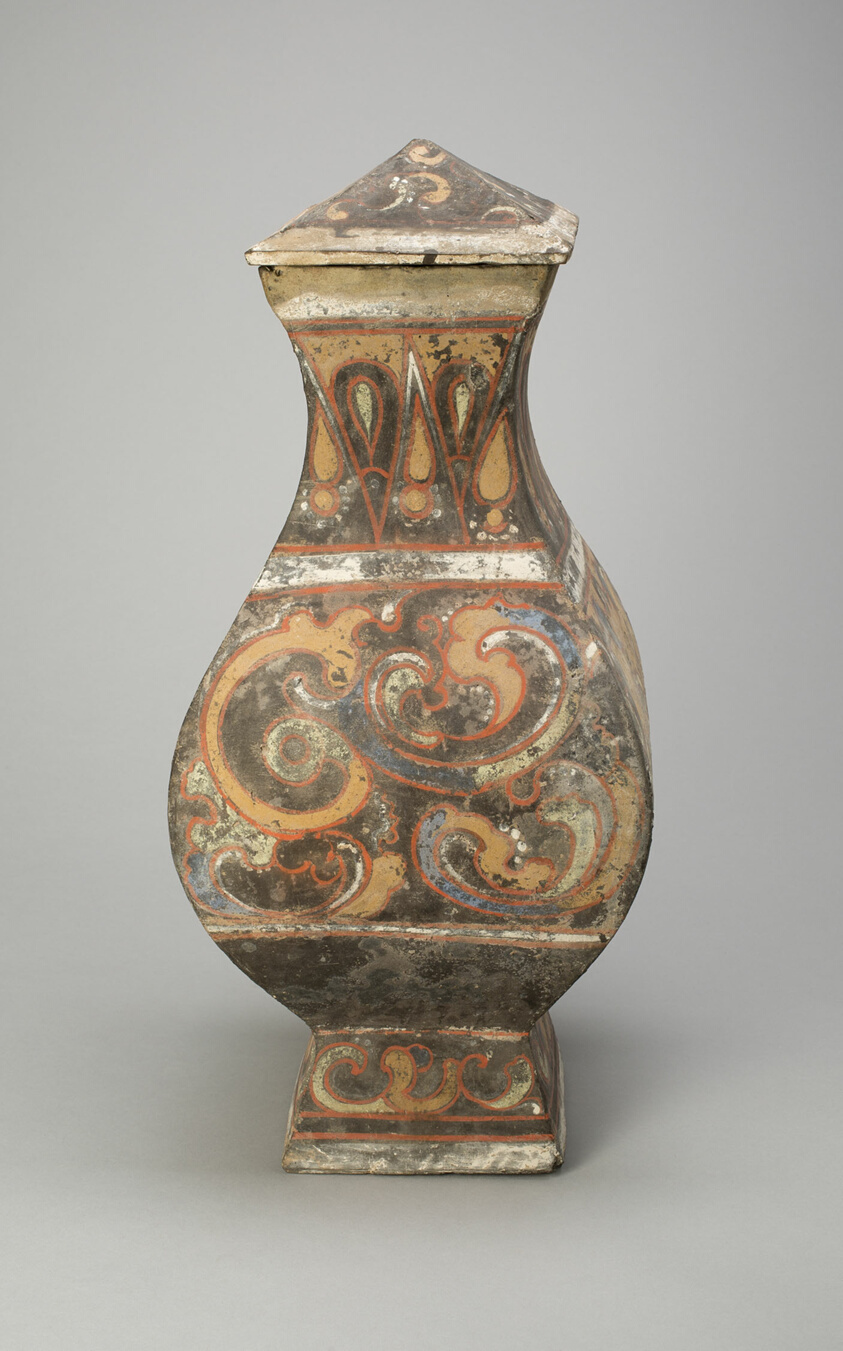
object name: Vessel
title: Square-Sectioned Jar (Fanghu)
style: Chinese (culture or style)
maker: China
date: Western Han dynasty, 206 BCE–9 CE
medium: Gray earthenware with polychrome pigments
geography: China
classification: earthenware; sculpture; ceramics; asian art; vessel